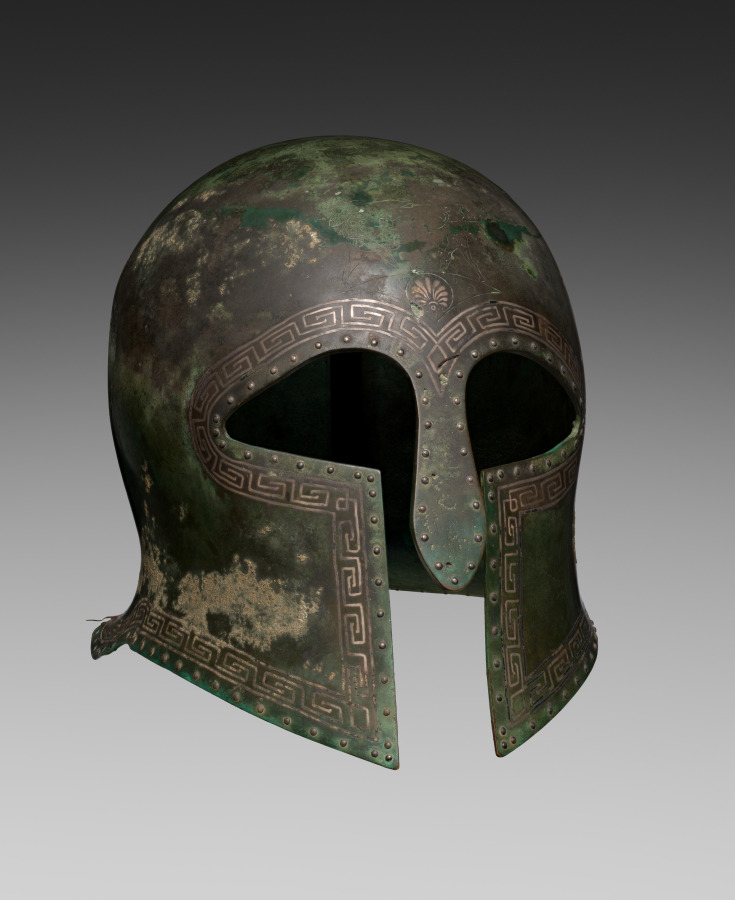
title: Corinthian Helmet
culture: Greece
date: 500–475 BCE or modern (before 1926)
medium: bronze with silver inlay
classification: Arms and Armor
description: Probably cast and then hammered into shape, this bronze helmet belongs to a type known as Corinthian, with almond-shaped eye holes, large cheekpieces, and a wide nose guard. Its significant weight raised early suspicions about authenticity, and although a 1928 technical examination found no conclusive evidence of forgery, scholars have continued to doubt its antiquity. Unusual details include the intact rivets, or metal fasteners, meant to secure liners; usually only their holes survive. The dueling warriors and inlaid palmette above the brow also find few parallels, and the silver meander pattern is unique. Most recently, a 2024 analysis found that both the copper and silver alloys of the helmet differ significantly from those expected in an ancient Greek helmet.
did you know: This helmet is very heavy—2.56 kilograms (5 lbs., 10 oz.), compared to average ancient helmets of 1.2–1.6 kilograms (about 3 lbs.).